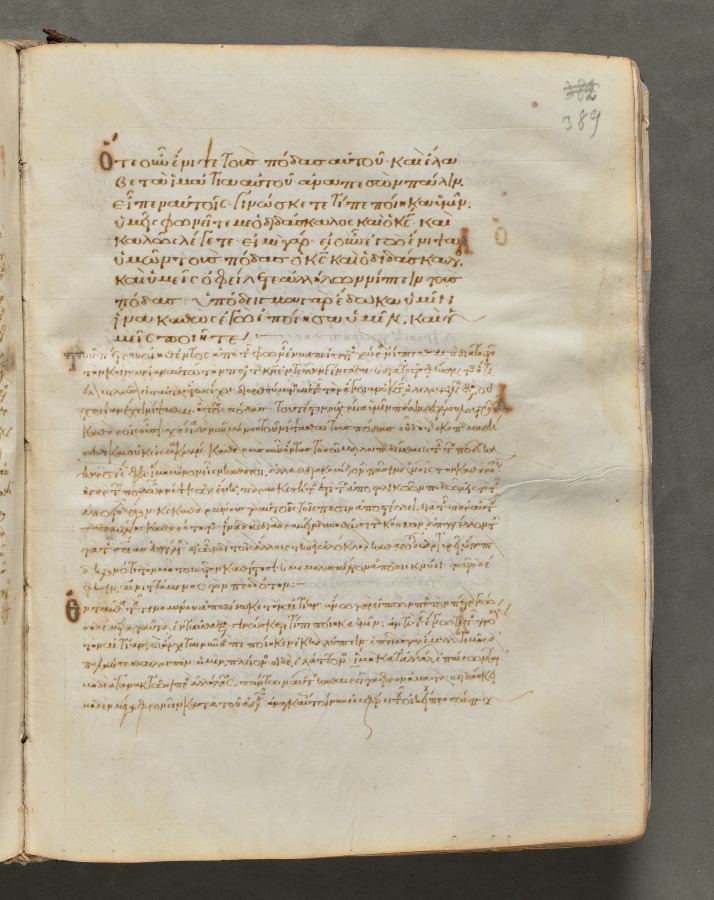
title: Text, folio 389 (recto), from a Gospel Book with Commentaries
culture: Byzantium, Constantinople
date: c. 1000–1100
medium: ink, tempera, and gold on vellum; leather binding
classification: Bound Volume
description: Each of the four gospels in this book opens on a page with brilliantly illuminated borders depicting the author of the text as well as birds—principally peacocks, symbols of the immortality of the soul—and fountains, representing the fountain of life and the salvation of the soul. This volume consists of 428 leaves with texts in Greek. Its level of sophistication suggests that it was probably written and decorated in a monastery in Constantinople.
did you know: Gospel books were carried in procession through Byzantine churches.